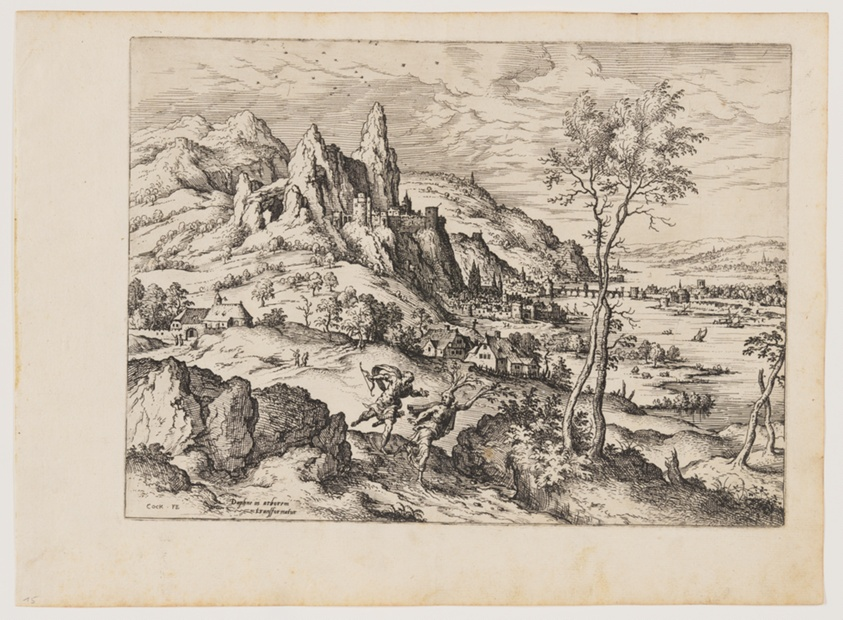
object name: Print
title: Daphne Persecuted by Apollo, from Landscapes with Biblical and Mythological Scenes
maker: Hieronymus Cock (Netherlandish, c. 1510–1570); after Matthys Cock (Netherlandish, c. 1505-1548)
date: 1558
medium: Etching on ivory laid paper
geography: Netherlands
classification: etching; paper; print; prints and drawing